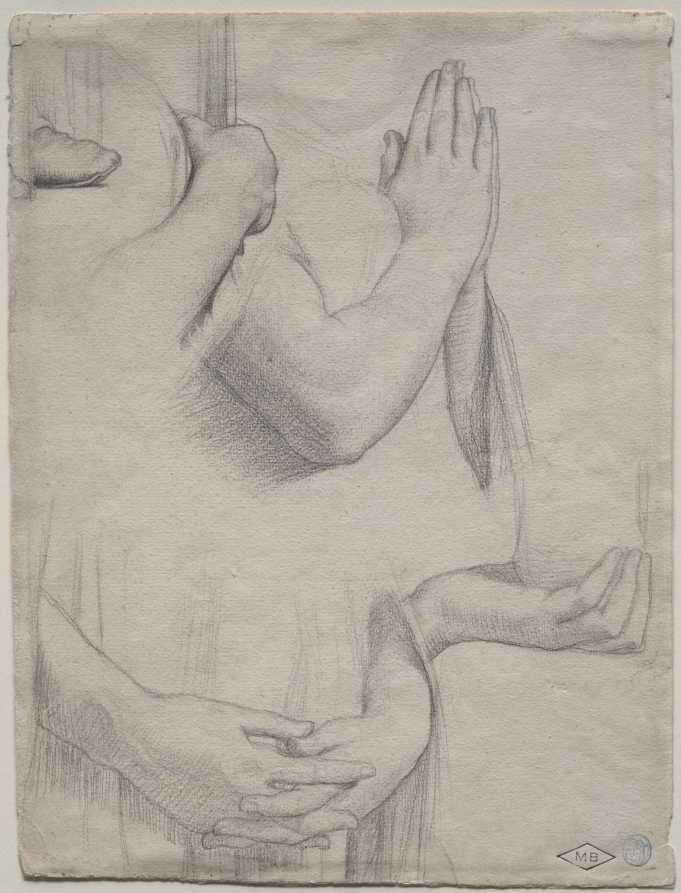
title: Study of Hands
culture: France, 19th century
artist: Jean-Auguste-Dominique Ingres (French, 1780–1867)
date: 1842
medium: graphite with traces of white heightening on ivory laid paper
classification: Drawing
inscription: inscribed, at bottom left, in pencil: Ste [illegible]; middle right (beneath knuckles), in graphite: Ste Marguerite / d’Ecosse; upper left (beneath foot), in graphite: Clotild; upper left (between toes and wrist), in graphite: Clotild; stamped, at lower right, in black ink: Marc Bernheim [Lugt 3528]; in blue ink: the artist’s studio stamp [Lugt 1477]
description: This sheet of studies was made as a preparatory design for a series of stained glass windows for the Chapel of Saint Ferdinand in Paris. Here, Jean- Auguste-Dominique Ingres sketched four sets of hands that seem to cascade down the page in one rhythmic motion, masterfully illustrating the beauty of mise en page. In his use of graphite, Ingres alluded to the metalpoint drawings of Raphael, intentionally channeling the Renaissance master.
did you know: Ingres executed many studies for each of his stained glass designs, from preliminary sketches such as this one to full-scale cartoons.